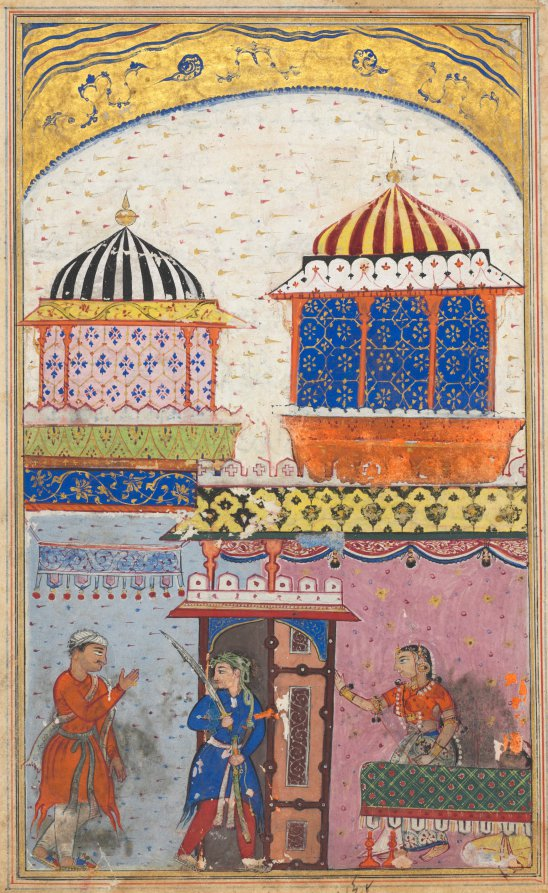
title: A woman asks her lover to leave her house, brandishing his sword and feigning rage in order to deceive her husband who has just arrived, from a Tuti-nama (Tales of a Parrot): Eighth Night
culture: Mughal India, court of Akbar (reigned 1556–1605)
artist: Gujarati (Indian, active 1550s-1590s)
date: c. 1560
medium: gum tempera, ink, and gold on paper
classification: Painting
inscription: kār guj[r]āt[ī]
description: A shrewd woman is carrying on an affair with a painter. When her husband suddenly returns home, she quickly concocts a plan to prevent them both from being caught. Hidden beneath the table is the painter’s young apprentice who, unbeknownst to the painter, was also seduced by the woman.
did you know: Gujarati is not a proper name but designates that the painter is from Gujarat.